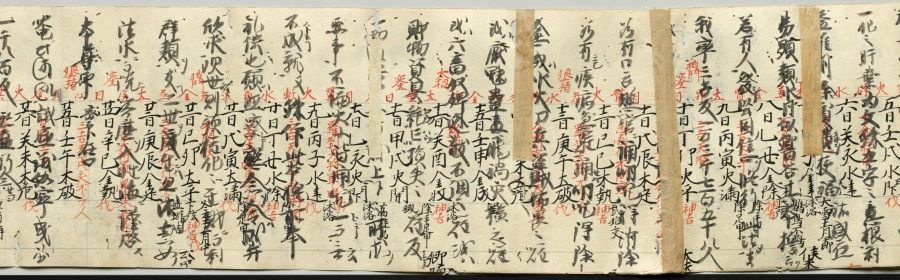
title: Scroll of Miscellaneous Notes written on a Calendar by Priest Seigen (verso)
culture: Japan, Kamakura period (1185–1333)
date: c. 1200–1231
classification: Manuscript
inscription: bears miscellaneous notes written by Priest Seigen.